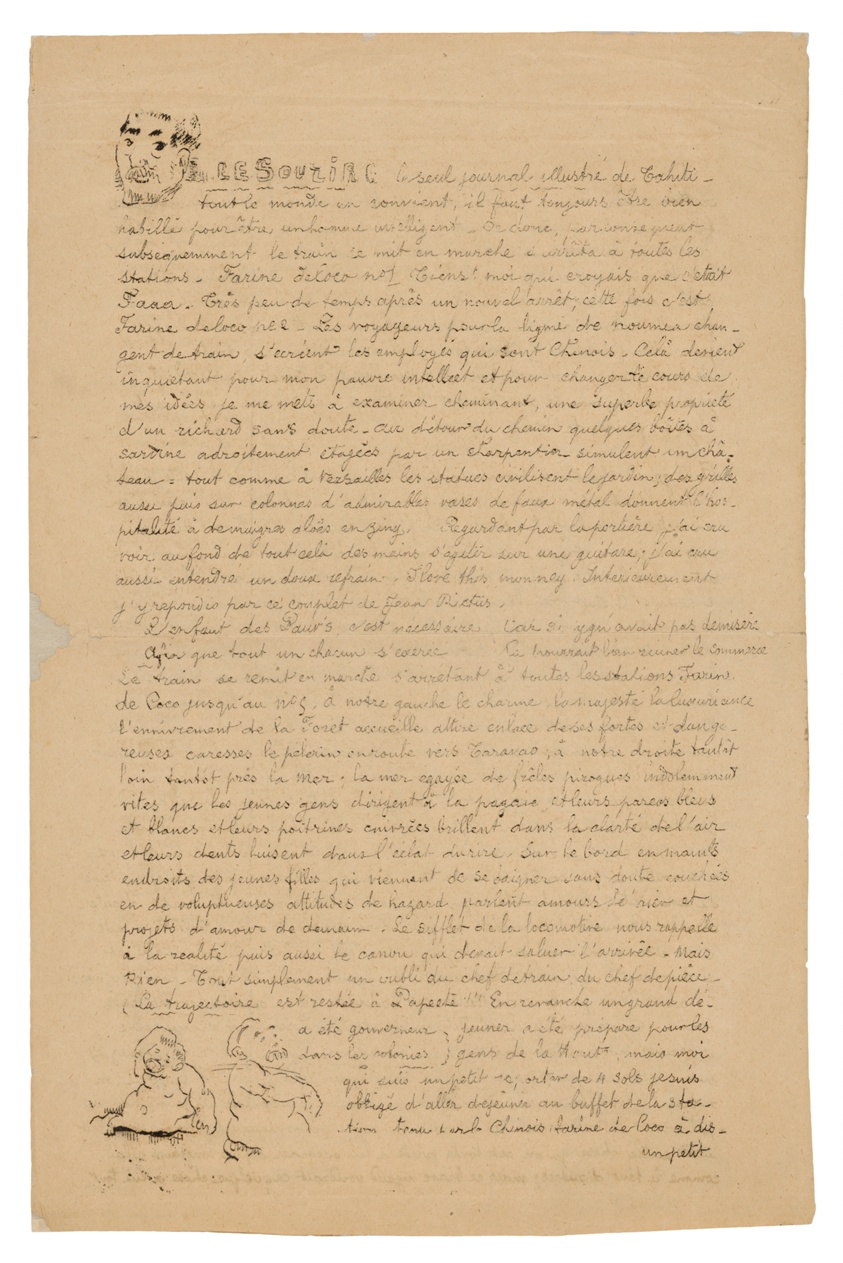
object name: Print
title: Le sourire: Journal sérieux, Aug. 21, 1899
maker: Paul Gauguin (French, 1848-1903)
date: 1899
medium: Mimeograph in brownish-black ink with touches of pink watercolor, and wood-block print in ocher ink, on cream wove paper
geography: France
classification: woodcut; print; prints and drawing